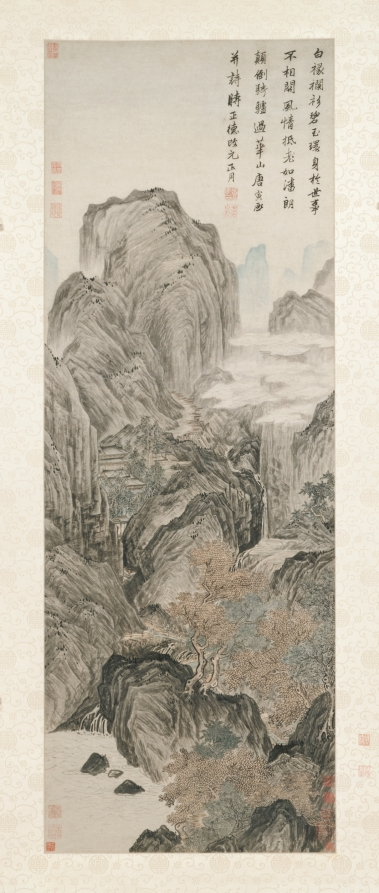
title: Mount Hua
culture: China, Ming dynasty (1368–1644)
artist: Tang Yin (Chinese, 1470–1523)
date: 1506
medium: hanging scroll; ink and light color on paper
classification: Painting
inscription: Artist's inscription, signature, and 4 seals: Wearing a white-bordered scholar's robe and green jade pendants, His life is unconcerned with worldly fame. Like P'an Lang resisting old age through high spirits, Crazy and clumsy he rides his donkey past Mount Hua. T'ang Yin painted this and composed the poem, the first month of the year of the Cheng-te era [1506]. [2 seals] T'ang Tzu-wei yin; T'ang. [2 seals, lower left corner] Po-hu T'ang Yin ssu yin; T'ang Chü-shih. trans. LYSL 12 additional seals: 2 of Wang Shan (1645-1728); 5 of Liu Shu (1759-1816); 1 of Yeh Ao (19th c.); 1 label and 2 seals of Lu Hui (1851-1920); 2 seals unidentified.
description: In this work, Tang Yin accumulates towering mountain summits in the manner of the Sung master, Li Tang, to capture the monumental presence of his subject. Tang Yin’s angular brushstrokes and ink washes of varied intensity give texture to the rocky surface and accent the play of light. Mount Hua is situated in southern Shaanxi province in North China. Hardly accessible during Tang Yin’s time, the mountains were frequented by immortality seekers to dwell or collect herbal drugs there. Tang Yin's potentially brilliant career was shattered in 1499 after he went to the capital to take the jinshi examination. He got entangled in a bribery case that caused him to spend seven years in prison. After his release, Tang returned to Suzhou, and settled on a career as a professional painter. One of Tang's few dated works, Mount Hua was painted seven years after this incident.